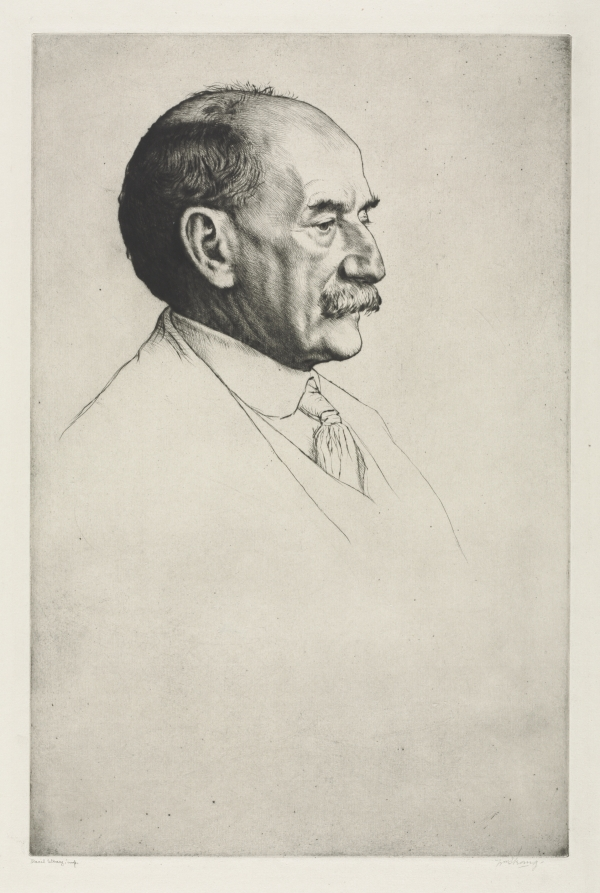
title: Thomas Hardy, Facing Right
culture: England, 20th century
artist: William Strang (British, 1859–1921)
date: 1910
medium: drypoint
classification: Print